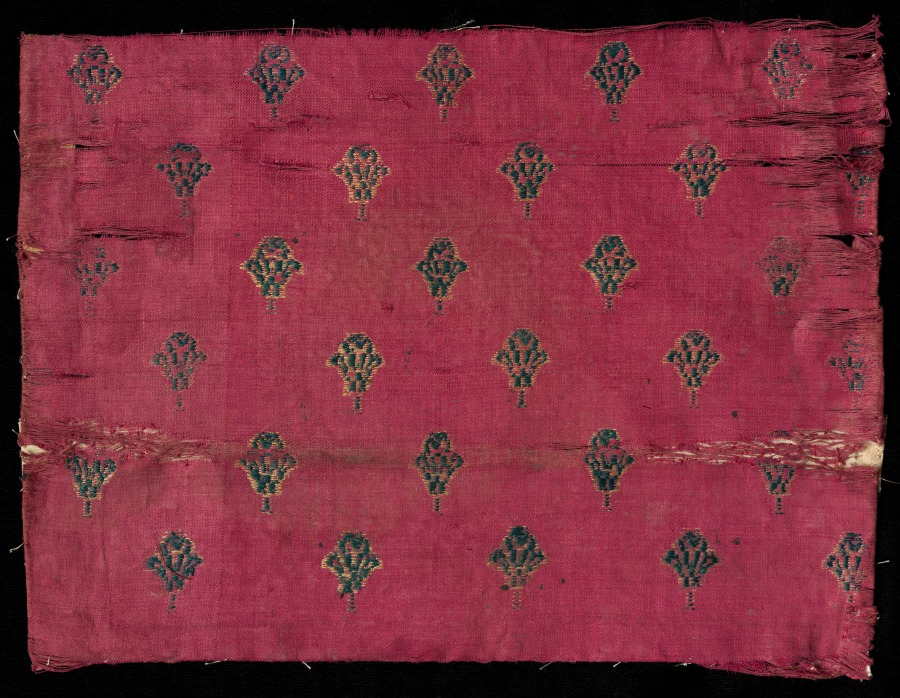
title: Brocaded Book Cover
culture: India, 19th century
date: 1800s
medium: brocade; silk and cotton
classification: Textile